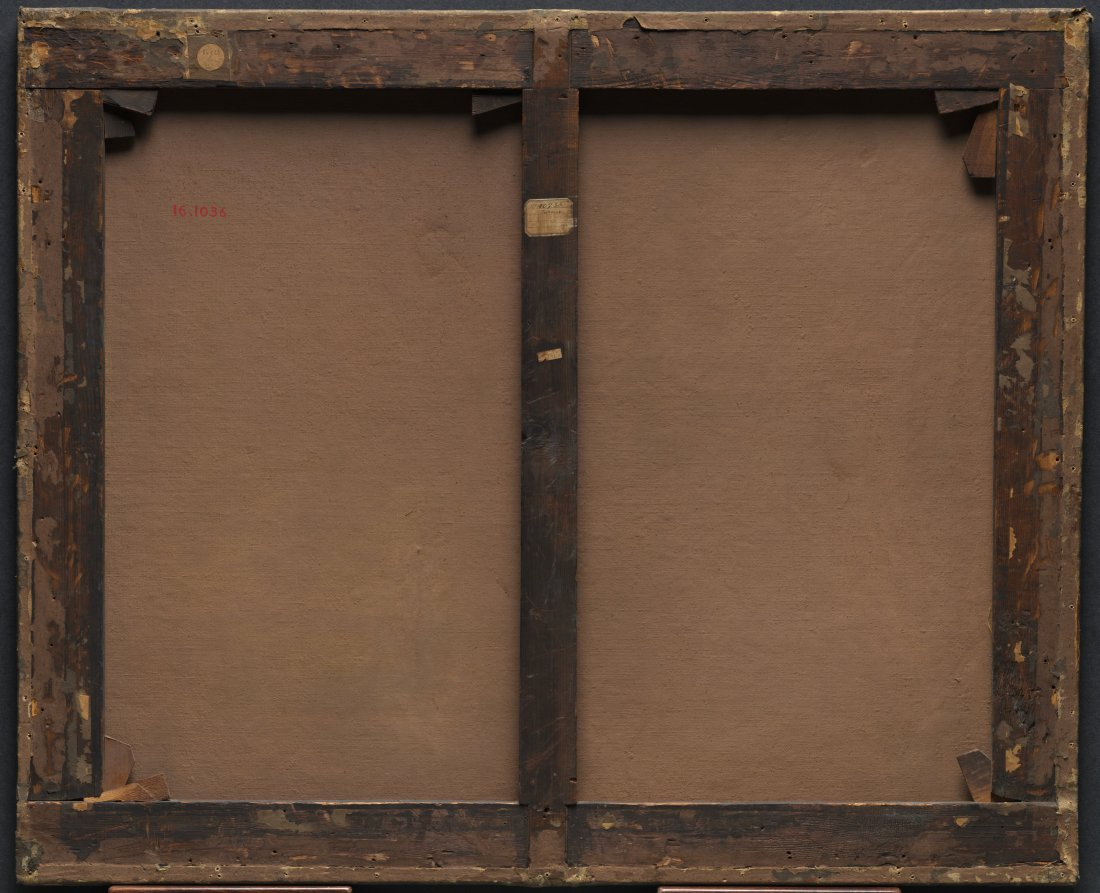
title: Queen Mab's Cave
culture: England, 19th century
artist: imitator of Joseph Mallord William Turner (British, 1775–1851)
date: after 1846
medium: oil on fabric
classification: Painting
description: This work is a reduced copy of a painting first exhibited by Turner at the British Institution in 1846 that passed, with the rest of his immense bequest to the nation, into the collections of the National Gallery and finally, in 1954, the Tate Gallery. Several lines from Shakespeare's A Midsummer Night's Dream and Turner's manuscript poem "Fallacies of Hope" were appended to the title in the British Institution catalogue, but they did little to explicate the nearly unintelligible concoction of fairies and Welsh ruins that make up this composition. Copies of Queen Mab's Cave by anonymous artists are abundant.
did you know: Queen Mab is a miniature fairy from English folklore who inspires dreams and plays pranks on people during the night. Shakespeare refers to her in both Romeo and Juliet and A Midsummer Night’s Dream,